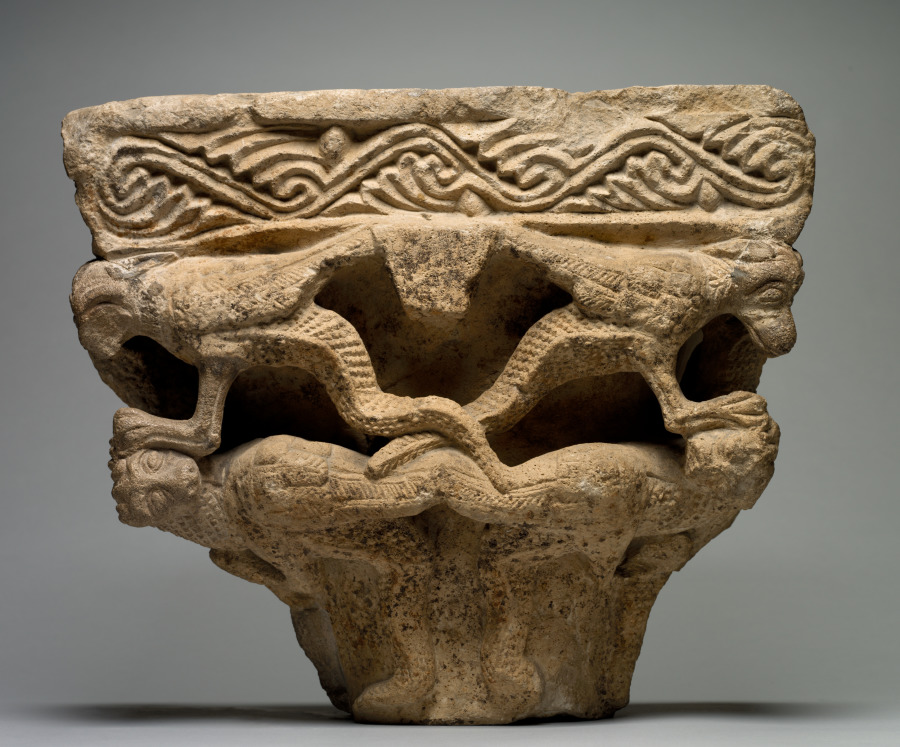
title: Capital with Dragons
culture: Southwest France, Languedoc, Toulouse (?), 13th century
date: 1200s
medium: limestone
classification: Sculpture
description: Monstrous images were prevalent in the decoration of religious buildings during the Middle Ages. Such images must have impressed, perhaps even terrified, the monks and visitors who spent much of their time within the cloister or church, a place of prayer, contemplation, and reflection. Scholars have speculated how such images would have been received by the people given the ubiquity of monsters in medieval society. The carved monsters, often symbolizing vice and retribution for sin, were possibly designed to provoke a range of emotional responses including laughter, wonder, surprise, fear, and shock. This striking imagery must have had a strong impact, which in turn led Saint Bernard of Clairvaux (1090–1153), the spiritual head of the Cistercian order, to admonish their use as distracting from prayer.